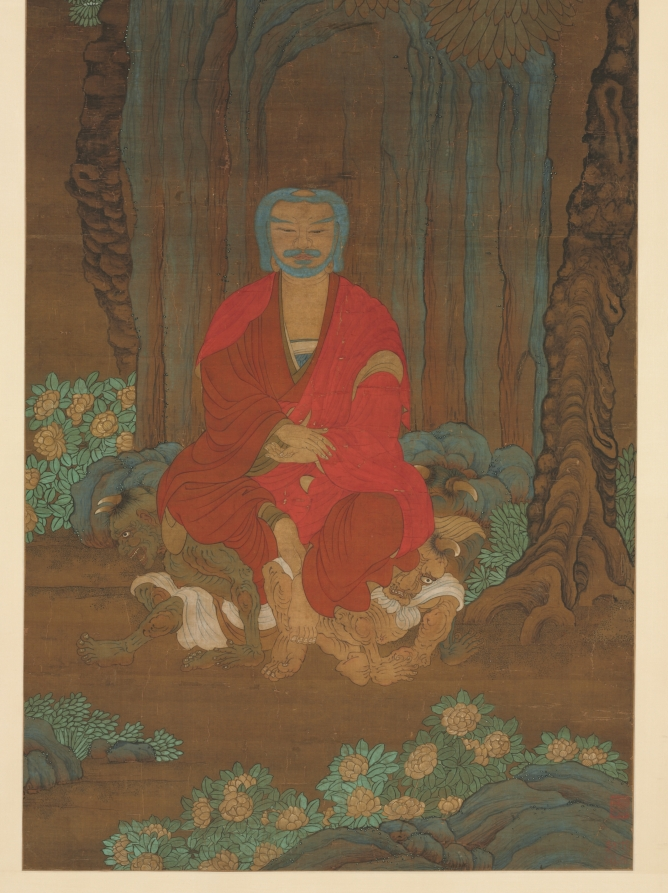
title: Shakyamuni under the Bodhi Tree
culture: China, Ming dynasty (1368–1644)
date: 1600–1650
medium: hanging scroll; ink and color on silk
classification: Painting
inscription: Artist's seal(?): Ta-fang-chih. 1 additional seal of Chiao Ping (dates unknown)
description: The historical Buddha Shakyamuni is seated in meditative posture upon the backs of three demons under the bodhi tree, where he achieved enlightenment. All three demons have horns like devils, and two have green skin. While they accommodate the Buddha, his weight seems to keep them under control. Since the Buddha’s hands do not conform to any accepted gesture, the specific religious event portrayed is unclear.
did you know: The blue-green style and grotesque goblins suggest an otherworldly sphere.